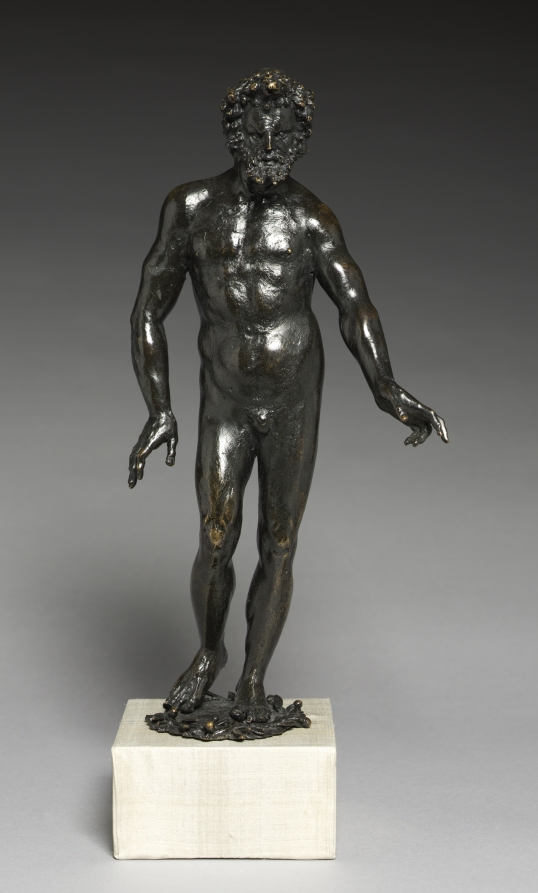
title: Standing Figure of a Man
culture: Italy, Siena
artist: circle of Francesco di Giorgio Martini (Italian, 1439–1501)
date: c. 1500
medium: bronze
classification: Sculpture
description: Derived from classical antiquity, this nude male stands in the contrapposto pose, bearing his weight on his left leg, with his right leg bent, as if in motion. He steps lightly, so that only the toes of his right leg touch the ground. He stands on a laurel wreath, a plant which in antiquity would be waved as a symbol of joy after a military victory. During the Renaissance, small bronzes were kept in cabinets, bringing the gods and goddesses of ancient times into the home. Flaws in the bronze casting suggest that this piece is from the early Renaissance. In 1971, Ulrich Middeldorf rejected Olga Raggio's original attribution to an anonymous Florentine, attributing it instead to the sixteenth-century Sienese artist Francesco di Giorgio Martini (1439-1501), based partly on its resemblance to Francesco's bronze angels in Siena's Duomo. However, such details as the awkward posture and frozen motion of the body relate this work more closely to Francesco's pupil Giacomo Cozzarelli (1453-1515). Standing Figure of a Man is attributed to the circle of Francesco di Giorgio Martini, as uncertainties remain regarding its exact author.